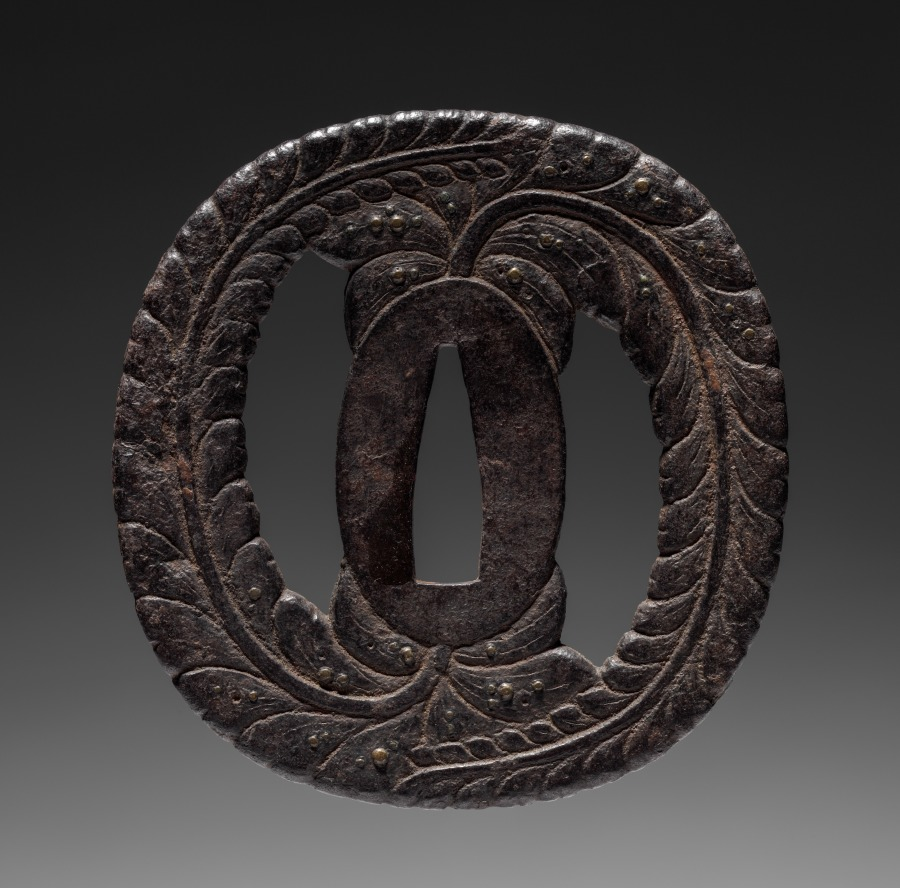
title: Sword Guard (Tsuba)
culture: Japan, possibly Edo period (1615-1868)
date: c. 1615–1868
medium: iron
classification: Arms and Armor